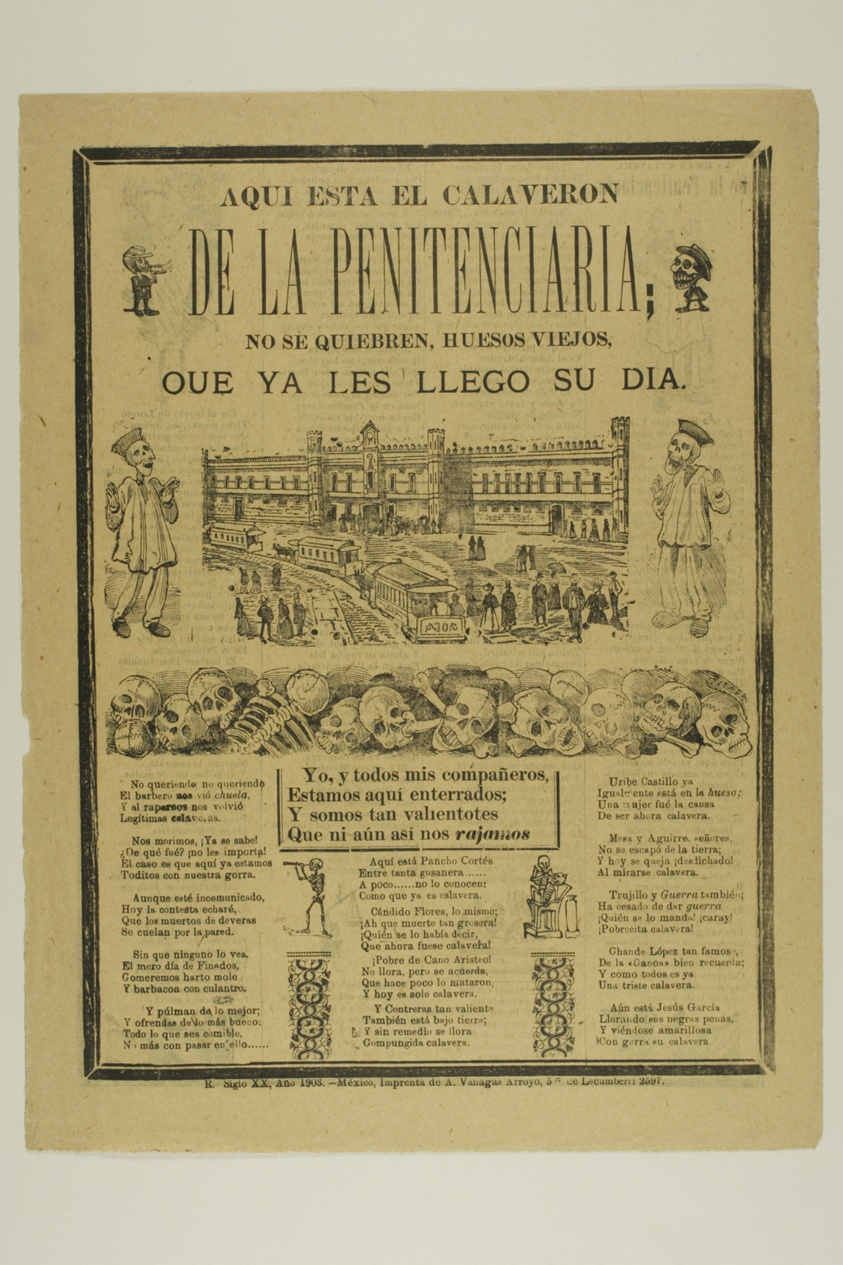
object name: Print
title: Here is the Calaveron of the Penitentiary. Don't break, old bones, for your day has just arrived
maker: José Guadalupe Posada (Mexican, 1852-1913)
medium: Photo relief etching on yellow wove paper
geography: Mexico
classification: relief etching; print; prints and drawing